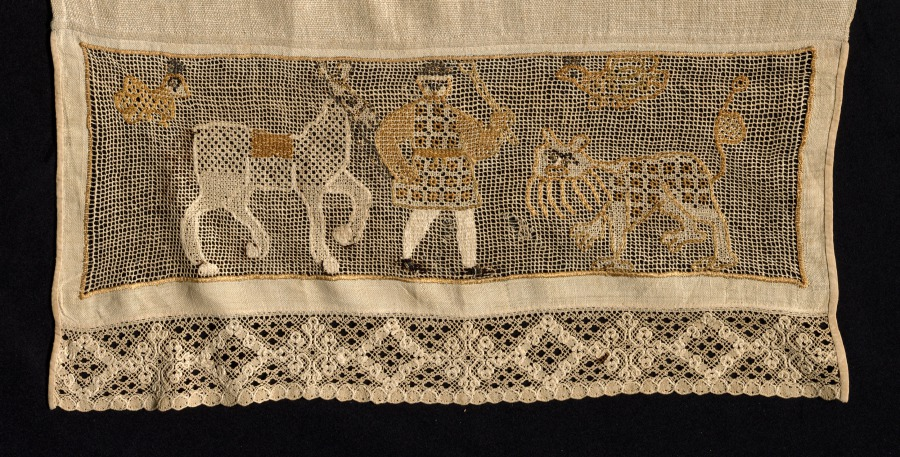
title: Towel with Border of Figures of Men and Animals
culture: Russia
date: 1700s–1800s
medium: Linen: needle lace (cutwork and drawnwork), straight (continuous) bobbin lace, tape lace edging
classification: Lace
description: On each end of this cloth is a lace border depicting a man walking with his mule and two birds flying above. The man and his mule are approached by a large feline, perhaps a panther, which is a common motif in Russian textiles. Metallic and colored silk threads are used to render the figures and create individualized details.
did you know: Handmade lace for marriage dowries was produced in large quantities in Russia during the eighteenth and nineteenth centuries.